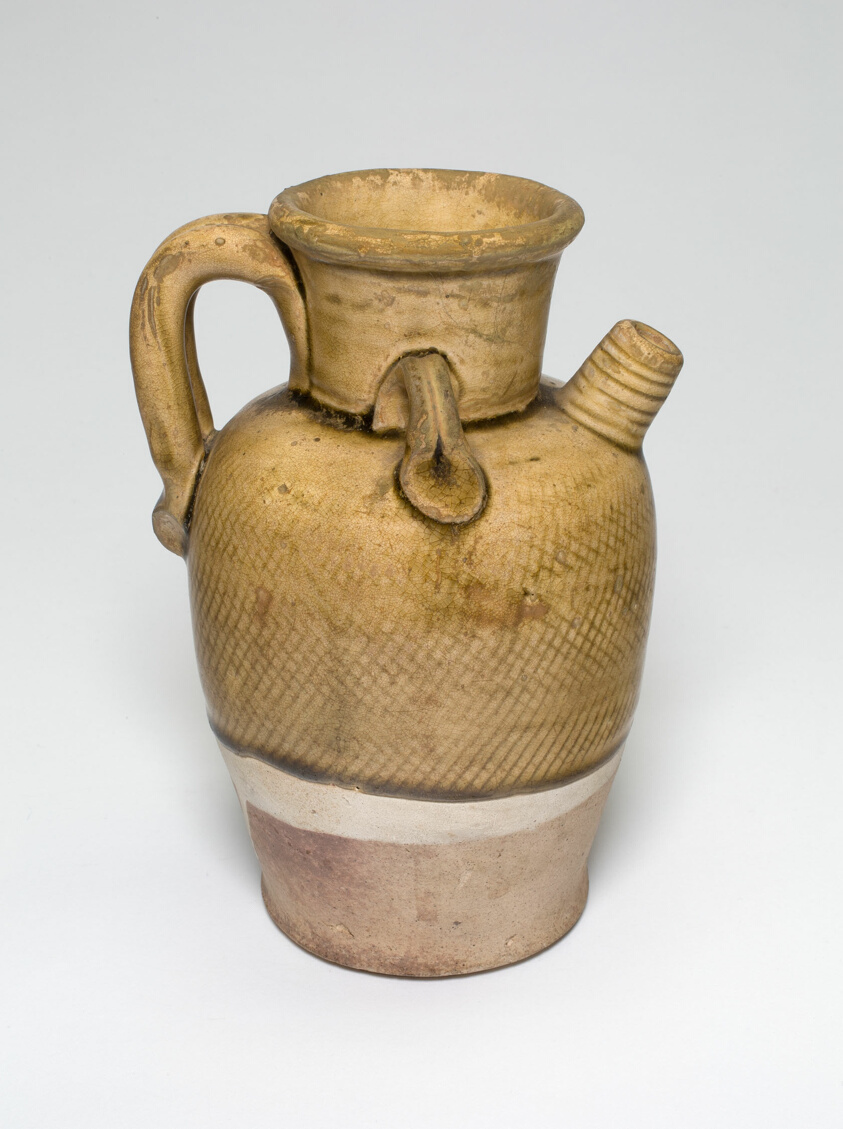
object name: Vessel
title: Spouted Ewer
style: Chinese (culture or style)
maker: China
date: Early Northern Song dynasty (960–1127)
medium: Cizhou ware; slip-coated stoneware with yellowish brown glaze and applied handle and loop handles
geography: China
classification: ewer (vessel); vessel; asian art; ceramics